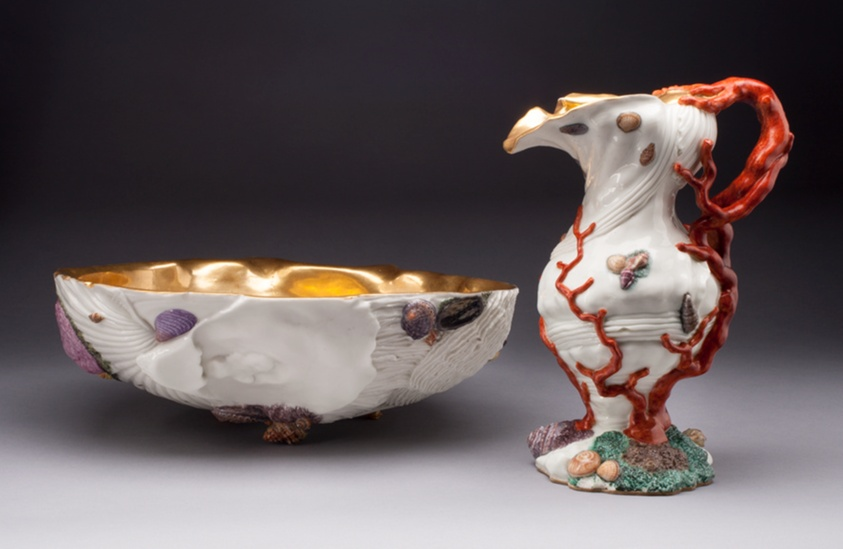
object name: Ceramics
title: Ewer and Basin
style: Rococo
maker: Capodimonte Porcelain Manufactory; Italian, founded 1743; Modeled by Giuseppe Gricci; Italian, c. 1700-1770; Naples, Italy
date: c. 1745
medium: Soft-paste porcelain, polychrome enamels and gilding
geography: Capodimonte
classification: ewer (vessel); porcelain; vessel; european decorative arts; ceramics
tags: seas, shells, coral